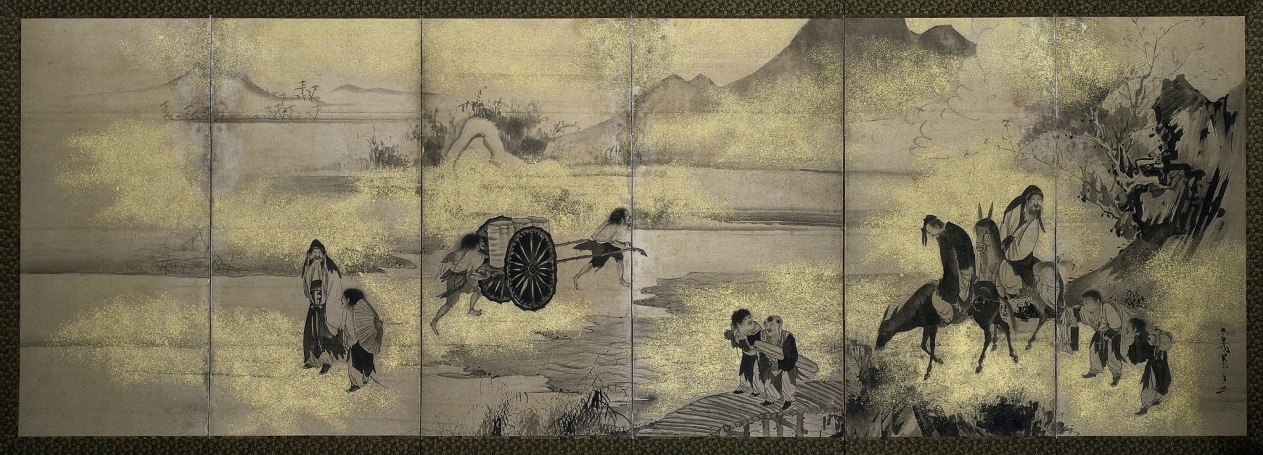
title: The Eight Immortals of the Wine Cup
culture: Japan, Edo period (1615–1868)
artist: Soga Shōhaku (Japanese, 1730–1781)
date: later 1700s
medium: six-panel folding screen, ink and cut-gold foil on paper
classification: Painting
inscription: signature upper left corner.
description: Responding to the desires of the middle class (chonin), some Japanese painters of the late Edo period moved away from the seriousness associated with the Chinese theme of reclusion, focusing instead on the motif’s humorous aspects. The theme Eight Immortals of the Wine Cup is based on a poem by the renowned 8th-century Chinese poet Du Fu about his eight colleagues. These scholars eagerly sought release from their official governmental duties and then supposedly fled the capital for the countryside. There, they engaged in wildly eccentric behavior and adventurous creative work, all fueled by copious amounts of wine. Shohaku’s version of events exaggerates the scholars’ pleasure, as seen in their comical facial expressions.